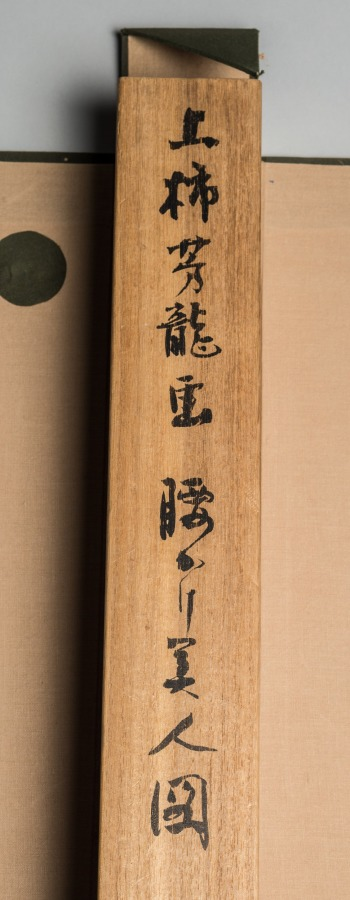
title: Courtesan Seated on a Bench Enjoying the Evening Cool in Summer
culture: Japan, Edo period (1615–1868)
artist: Kamigaki Hōryū (Japanese, dates unknown)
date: 1615–1868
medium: hanging scroll, ink and color on silk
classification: Painting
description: In a pensive pose with her chin resting in her hand, a courtesan is seated on a wooden bench that extends diagonally across the lower half of the scroll. Her open robe suggests that it is a warm evening-perhaps late summer or early fall, as indicated by the grapevine pattern on her kimono. The floral patterns in the composition hint at the seasons: the plum blossom on the fan for spring; grape pattern on the robe for late summer; and chrysanthemum design on the bench indicating autumn. Note also how the grapevine pattern in the painting's mounting mimics the design of her kimono. The overall mood is one of intimacy, created by Hõryþ through the delicate rendering of the courtesan's facial features and hands. In contrast to the other scrolls of beauties nearby, the artist here portrayed his subject with little background, allowing her grace and elegance to carry the picture.